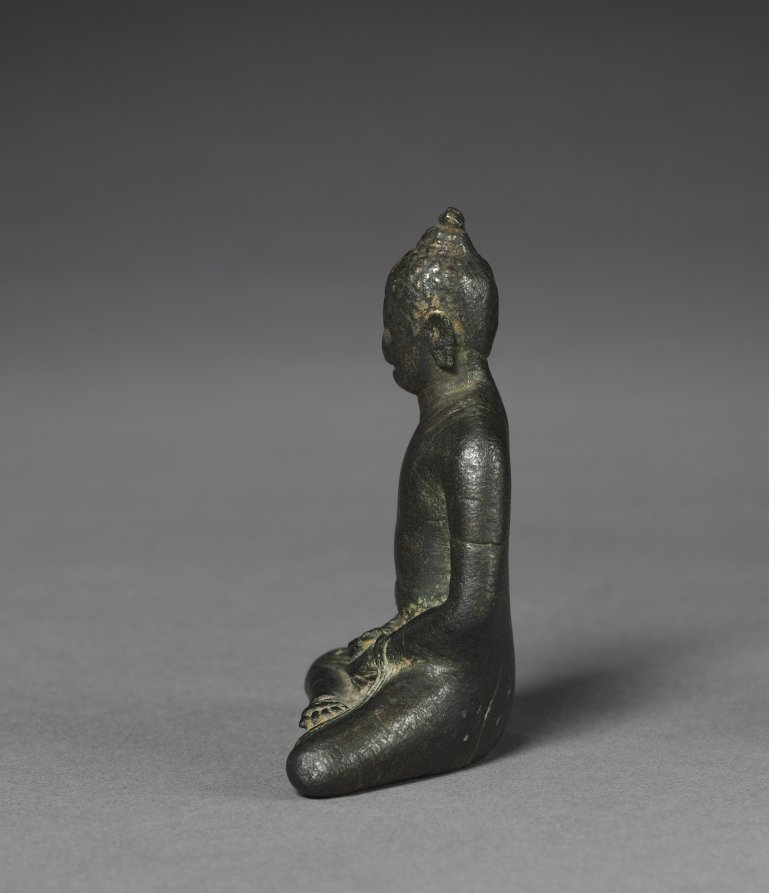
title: Sakyamuni Buddha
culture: Ceylon, Anuradhapura style, 7th-8th Century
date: 600s-700s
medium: bronze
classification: Sculpture